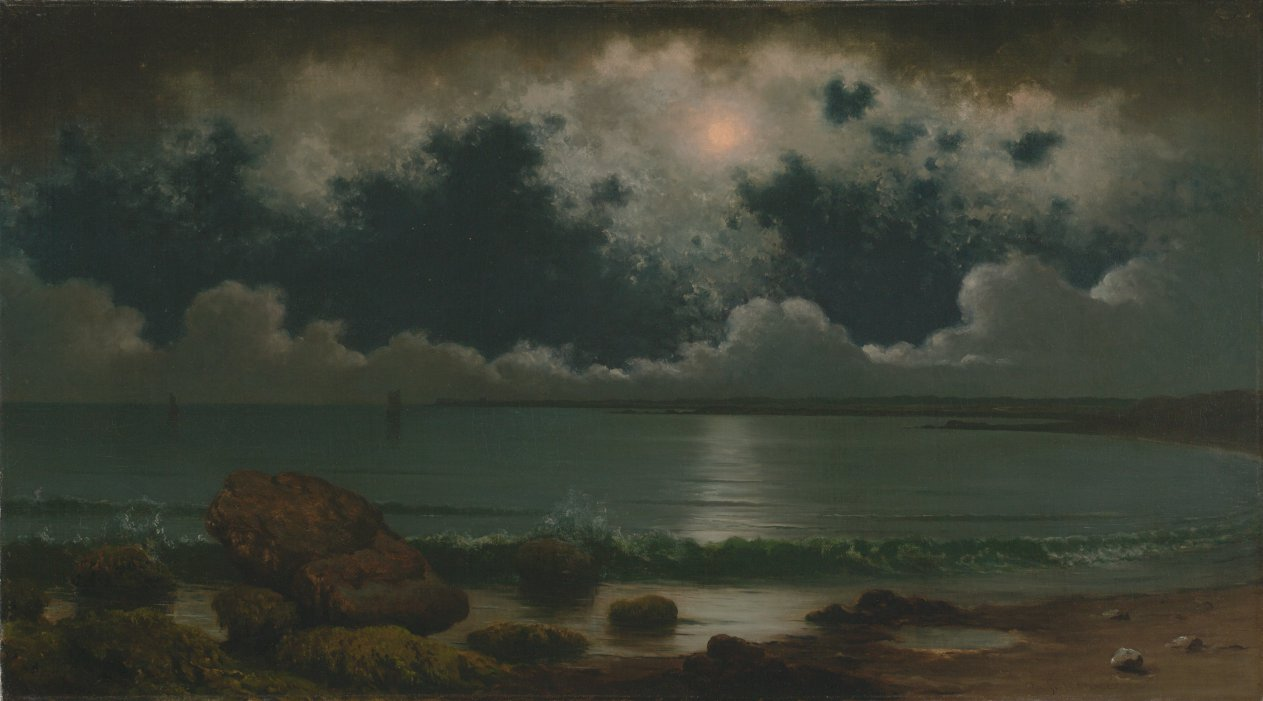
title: Point Judith, Rhode Island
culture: America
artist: Martin Johnson Heade (American, 1819–1904)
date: 1867–68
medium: oil on canvas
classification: Painting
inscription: Signed lower right: M.J. Heade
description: One of only a handful of nocturnal scenes painted by Heade, this evocative painting captures the effects of glimmering moonlight on land, sea, and sky. Although the artist depicts a specific location, his nighttime rendering shrouds most details in shadow, imparting a greater sense of mood than place. Human presence manifests itself through two sailing ships on the left side of the composition.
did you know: Home to Point Judith, the beach town of Narragansett has its population double during summertime.